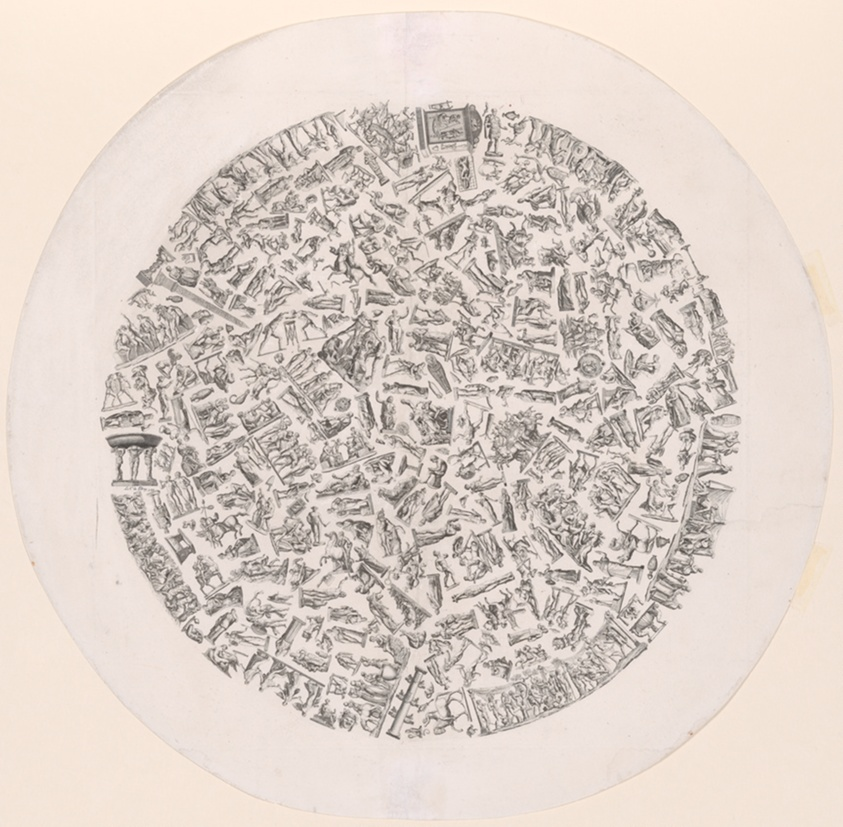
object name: Print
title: Mosaic of Archetypes from Antiquity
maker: Jean Philippe Guy Le Gentil; French, 1750–1824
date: 1789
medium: Engraving in black on ivory wove paper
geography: France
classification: print; paper; etching; prints and drawing